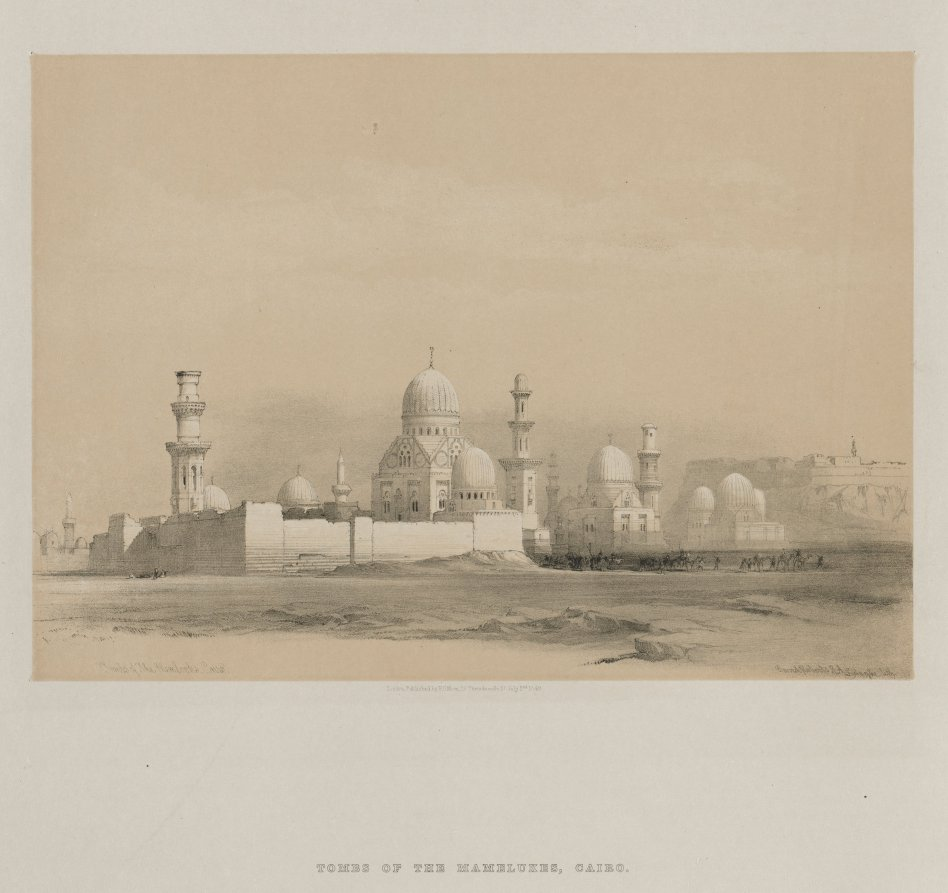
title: Egypt and Nubia, Volume III: Tombs of the Memlooks, Cairo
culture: England, 19th century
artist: Louis Haghe (British, 1806–1885)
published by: F. G. Moon, 20 Threadneedle Street, London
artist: after David Roberts (Scottish, 1796–1864)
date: 1849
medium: color lithograph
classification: Print